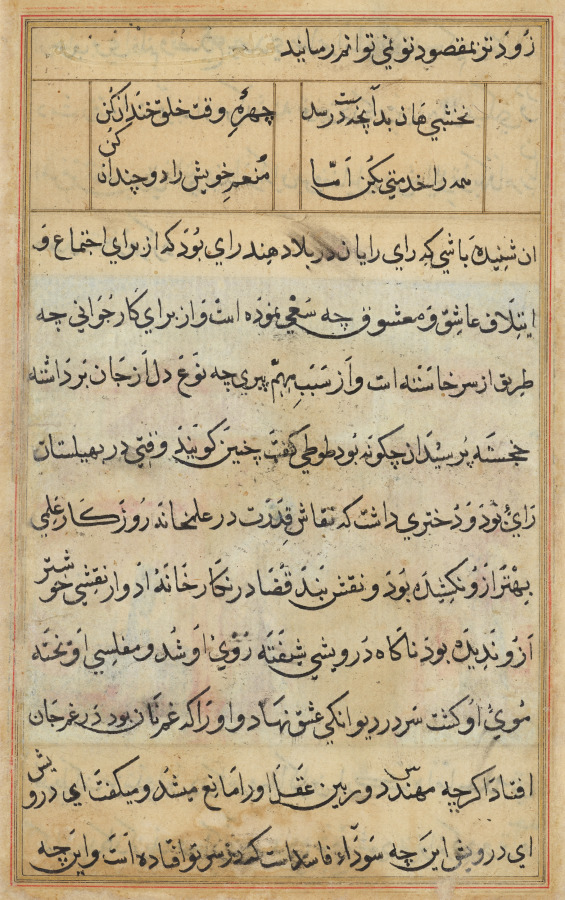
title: Page from Tales of a Parrot (Tuti-nama): text page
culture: Mughal India, court of Akbar (reigned 1556–1605)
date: c. 1560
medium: gum tempera, ink, and gold on paper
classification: Painting